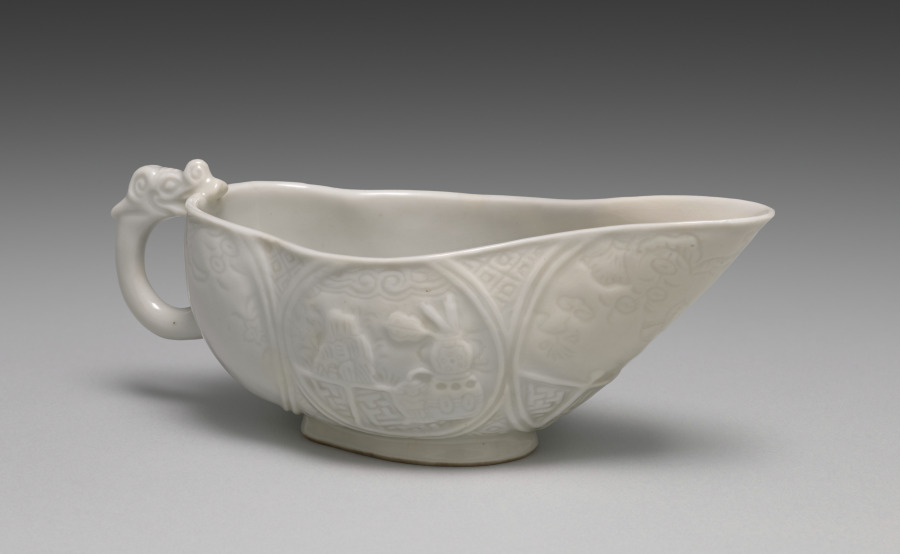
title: Water Cooler with Chinese Gardens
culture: Japan, Meiji period (1868–1912)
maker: Seifū Yohei III (Japanese, 1851–1914)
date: 1893–97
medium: Porcelain with molded and carved designs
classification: Ceramic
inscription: Artist's seal beneath the handle.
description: Unlike most pieces by the Seifu Yohei studio, this one bears a seal beneath the handle rather than on the base. The glaze and technique are identified on the box as taihakuji, or “great white porcelain,” an important early invention Yohei III devised in 1872 that involved the combination of a distinctive translucent, creamy glaze over an ivory-colored clay body. The body’s two sides have garden scenes seen through windows. Designs of flowers and butterflies are incised in the spaces at both ends. The garden on the right-hand side of the vessel, seen through a round window, has a decorative rock with grasses beneath a cloudy sky; and on a tiled veranda, there is a teapot as well as a fan and two scrolls inserted into a double-handled urn or kettle atop a brazier. The garden on the left-hand side has two enormous flowers below what may be either a cloud or a rippling pond; a garden rock—or perhaps a carved wood sculpture—with a circular perforation sits on what appears to be a veranda. While the details may be open to interpretation, the setting is a rather glamorous Chinese residence or palace with a superbly tended garden in spring or summer.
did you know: This water cooler has a handle with a dragon head.